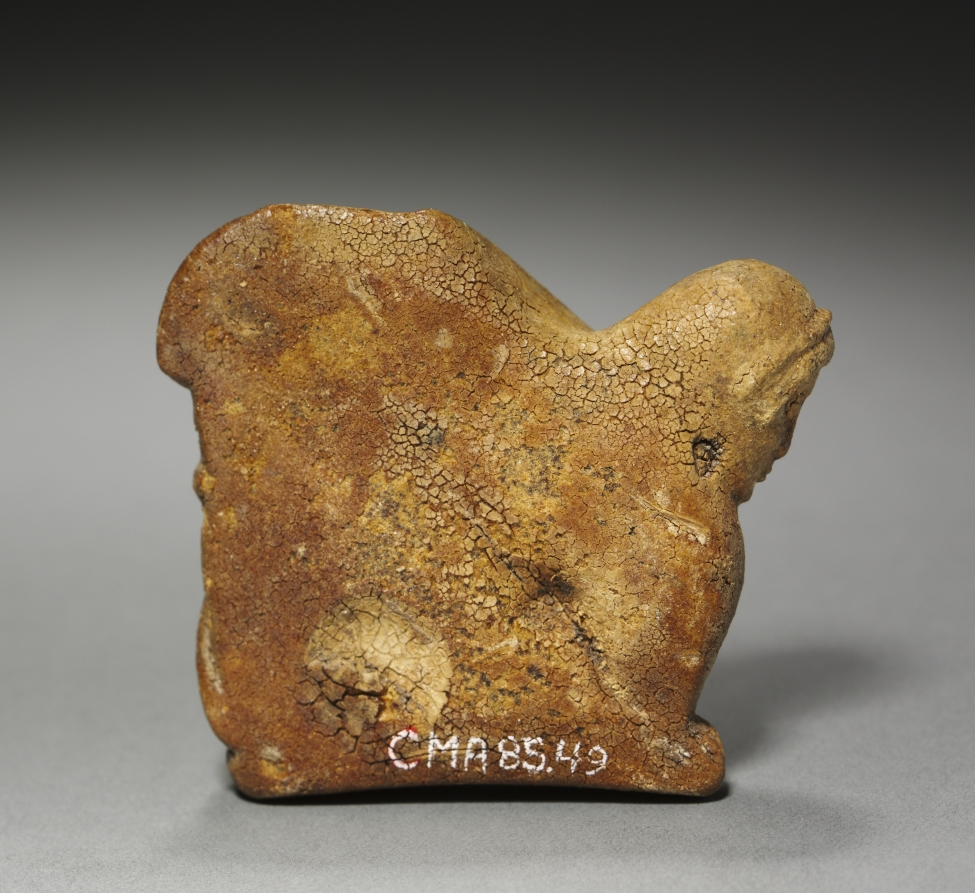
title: Sphinx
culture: Greek/South Italian, Taranto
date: c. 500 BCE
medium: amber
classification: Sculpture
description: Amber, a form of fossilized tree resin, was much prized in the ancient Mediterranean world, perhaps due to its mysterious luminosity, fragrance, and magnetism. It was often carved into figures or heads of humans, animals, or mythical creatures. Small perforations on this sphinx suggest that it may once have been mounted, perhaps for use as a pendant. Although now opaque and crackled due to age, in antiquity the surface probably exhibited some degree of translucence, a valued attribute for amulets and ornaments.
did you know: A sphinx combines the body of a winged lion with the head of a woman.